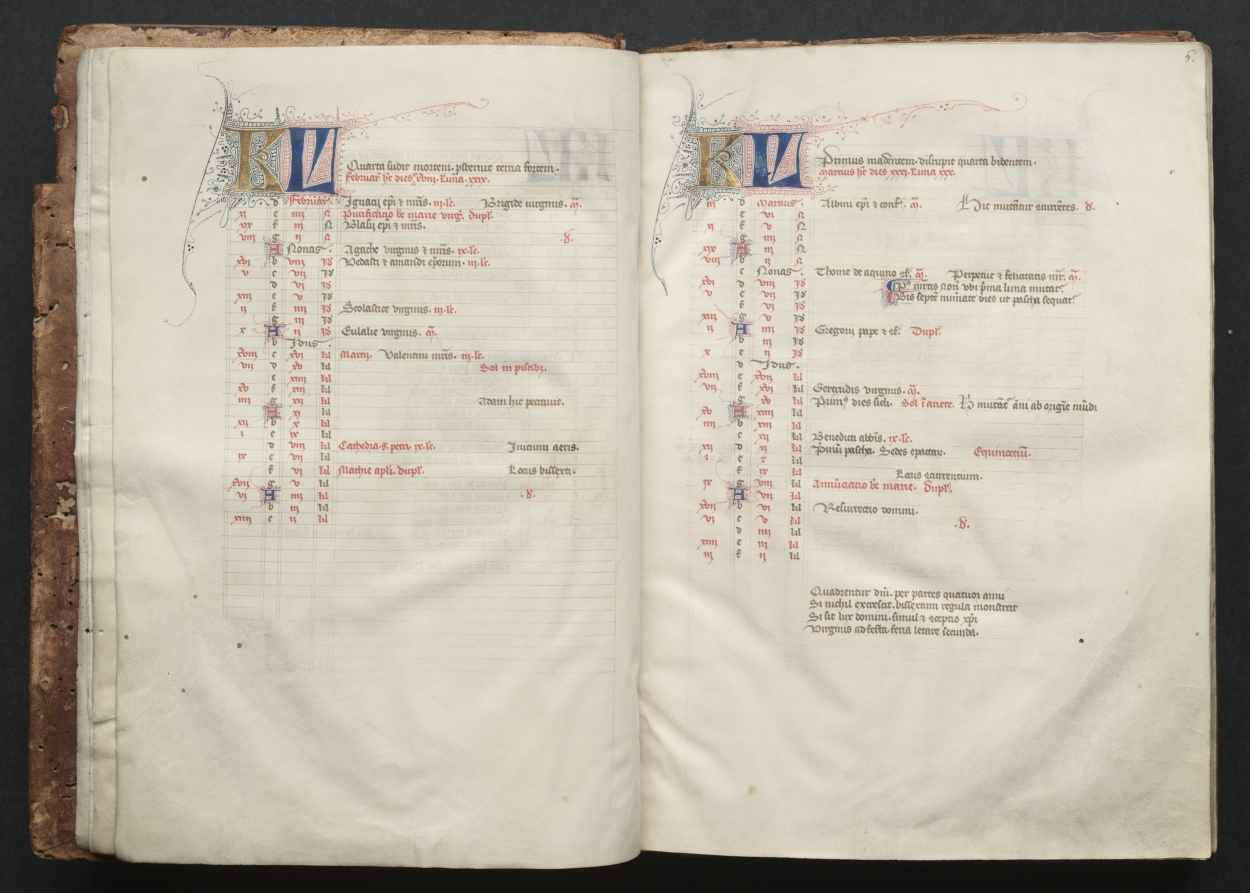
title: The Gotha Missal: Fol. 5v, Text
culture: France, Paris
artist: Master of the Boqueteaux (French)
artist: and Workshop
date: c. 1375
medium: ink, tempera, and gold on vellum; blind-tooled leather binding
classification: Bound Volume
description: The style and quality of this manuscript's decoration is typical of deluxe Parisian books made for aristocratic or royal patrons. Most of the book's decoration appears to be the work of the Master of the Boqueteaux, an artist active at the court of King Charles V (died 1380). His style was apparently shared by a number of book illuminators working in and around Paris. It is very possible that the Gotha Missal belonged to Charles V, but is not provable because the manuscript has no royal portraits and lacks a colophon. Given the book's magnificent decoration, however, it would seem that it was produced for a Valois prince, if not for the king himself. The manuscript receives its name from the German dukes of Gotha, its later owners.